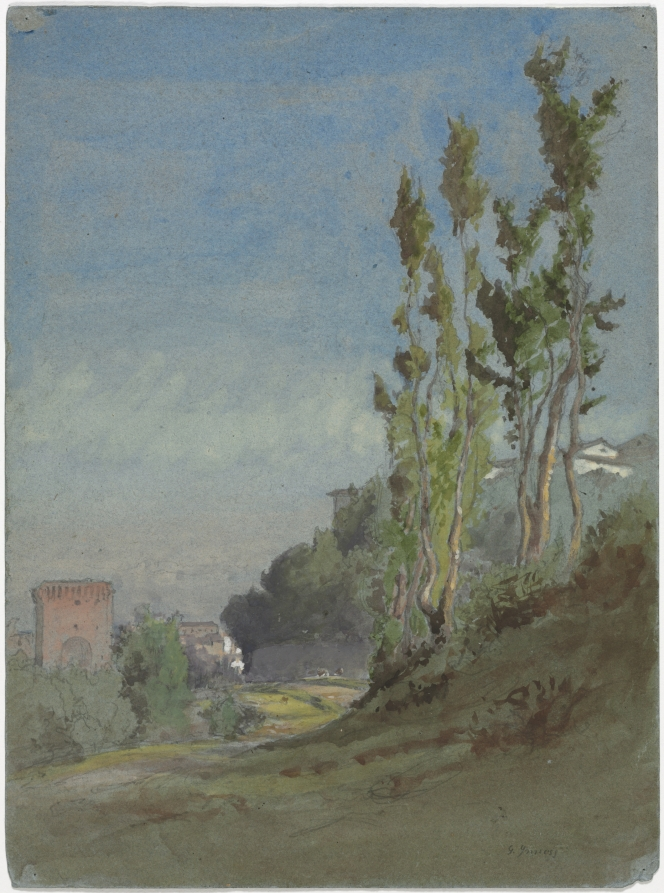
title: Albano, Italy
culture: America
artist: George Inness (American, 1825–1894)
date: c. 1872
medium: watercolor with gouache over graphite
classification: Drawing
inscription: Signed, lower right, in graphite: "G. Inness"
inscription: verso, by unknown hand, in graphite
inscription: Upper left: "No 11"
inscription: Lower left, in graphite: "No 21 [crossed out] 16 [circled]"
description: This lyrical drawing on brilliant blue paper was done on a trip to Italy, where George Inness made a series of watercolor sketches of the Italian countryside in the vicinity of Albano. In contrast to the precision of his earlier Hudson River school paintings, in the early 1870s his work achieved a new freedom. This drawing is reminiscent of a classical Italian landscape, illustrating a broad expanse with a road winding through an Italian village, complete with framing trees in the foreground and ancient fortifications in the background. Inness made this drawing by applying wet washes one on top of another, intentionally creating a blurred effect, like that of a memory from the distant past.